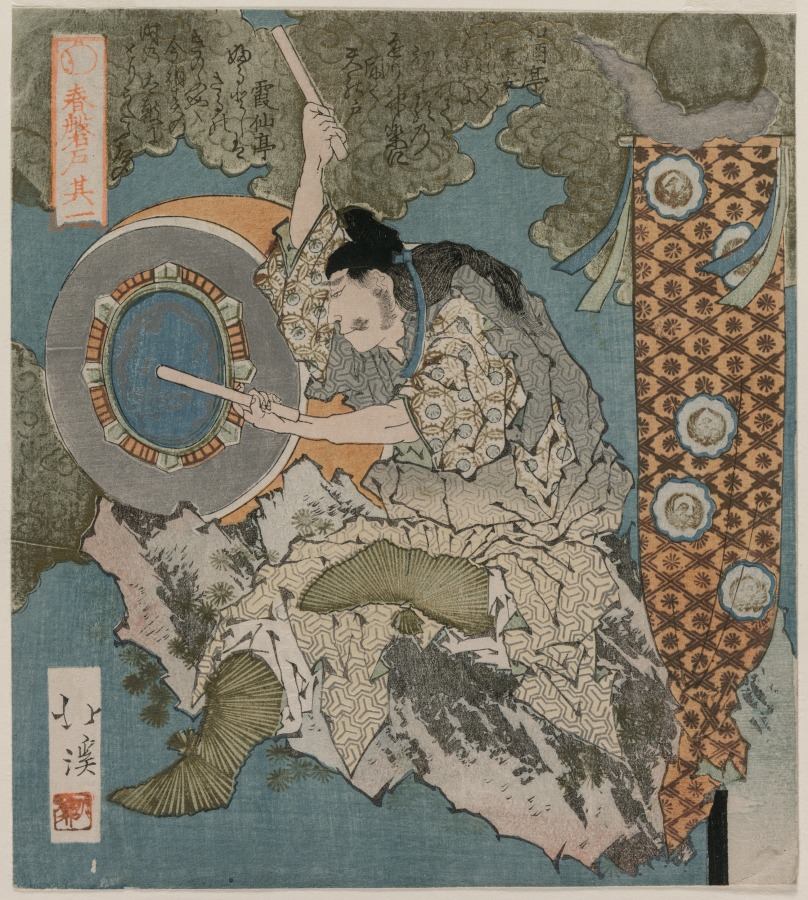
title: The Cave Door of Spring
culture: Japan, Edo period (1615–1868)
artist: Totoya Hokkei (Japanese, 1780–1850)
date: 1825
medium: pentaptych of woodblock prints; ink and color on paper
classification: Print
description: These prints form a composition inspired by a story about the deity Amaterasu. She was once so offended by her brother that she retreated into a cave, leaving the earth in darkness. Several attempts to lure her out with cocks crowing, music-making, and a goddess dancing failed, but a mirror hung from a nearby tree made Amaterasu curious, bringing her to the entrance of the cave. A stone was quickly placed at the entrance to block her way back into the cave, and light was restored to the world. The scene across the prints is unified by embossed clouds enriched with gold, silver, and copper.